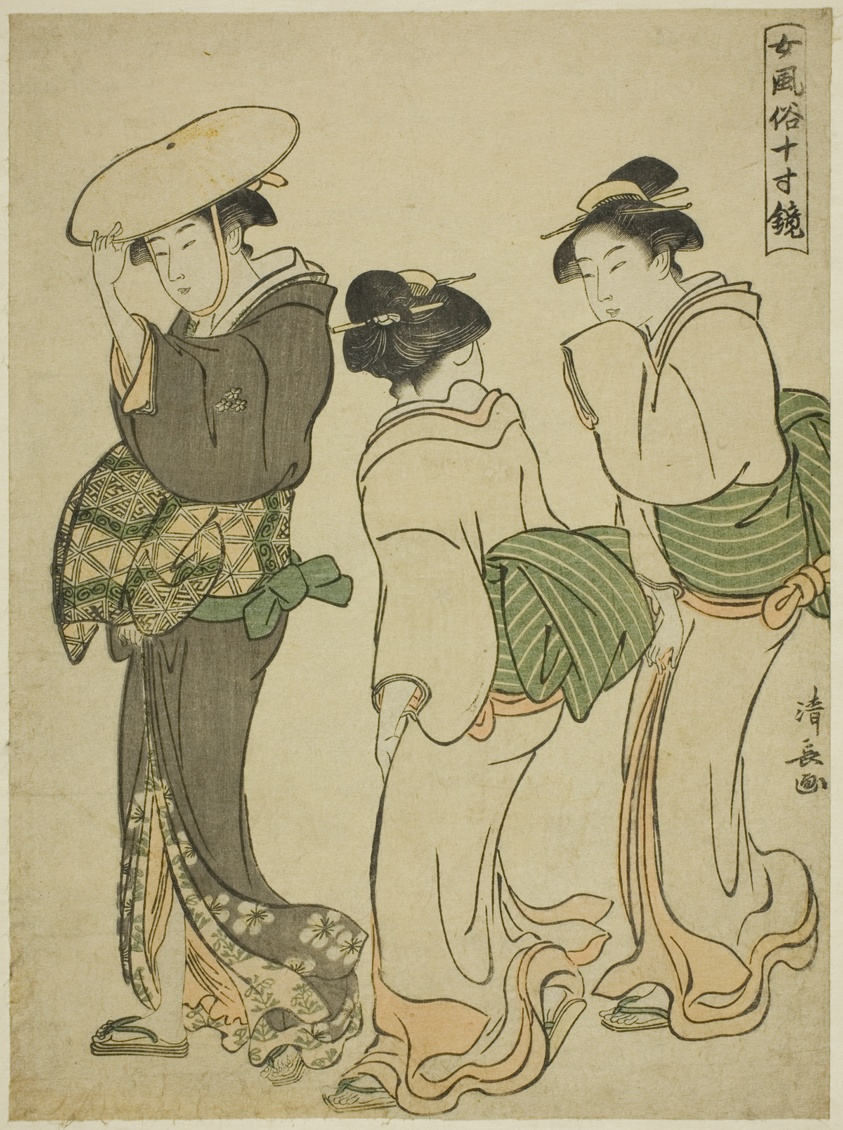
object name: Print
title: A Woman and Two Maids, from the series "A Mirror of Feminine Manners (Onna fuzoku masu kagami)"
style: Japanese (culture or style)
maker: Torii Kiyonaga (Japanese, 1752-1815)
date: c. 1790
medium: Color woodblock print; chuban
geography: Japan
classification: woodblock print; print; asian art